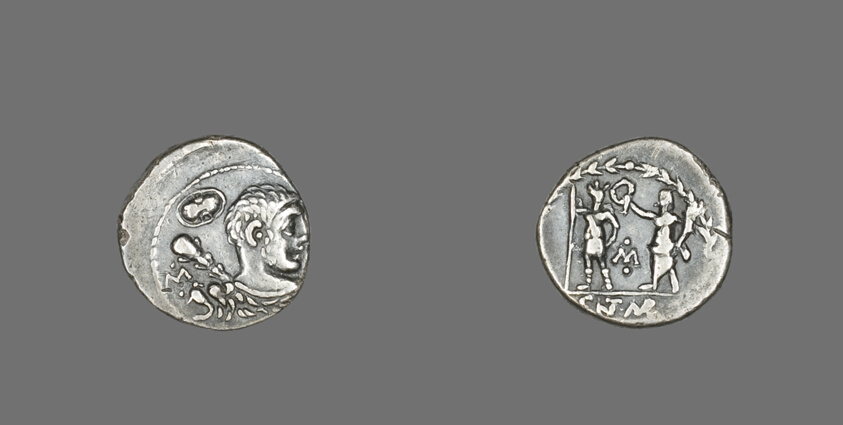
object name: Coin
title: Denarius (Coin) Depicting the Hero Hercules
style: republic period, ancient, roman (ancient, style or period)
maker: Roman, minted in Rome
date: 100 BCE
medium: Silver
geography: Italy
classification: coin; ancient art; struck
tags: Heracles, goddesses